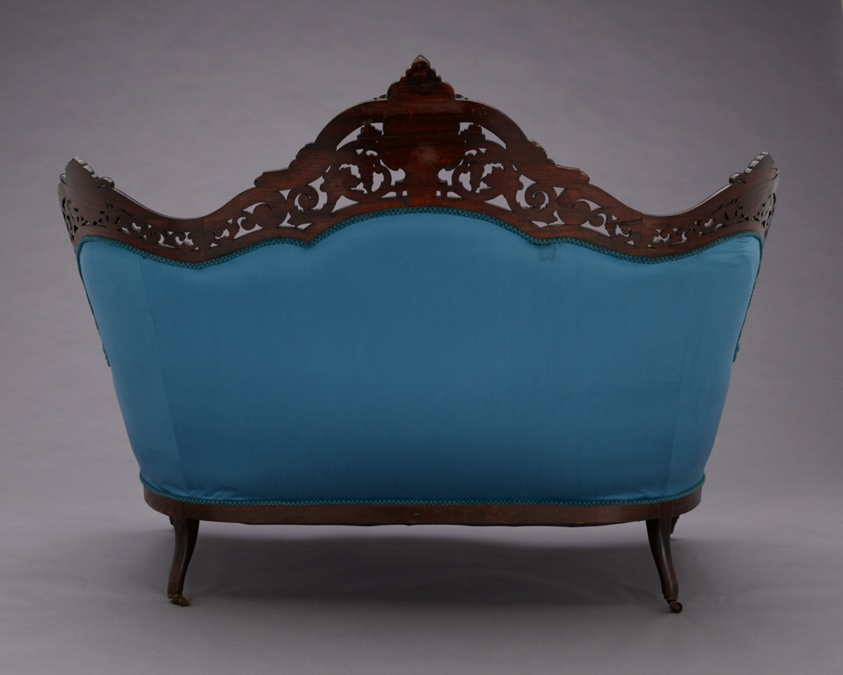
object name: Furniture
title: Sofa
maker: John and Joseph W. Meeks Company; American, active 1836–59; New York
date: 1856–65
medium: Rosewood and upholstery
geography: New York City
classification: seating; furniture; american decorative arts; american arts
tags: furniture